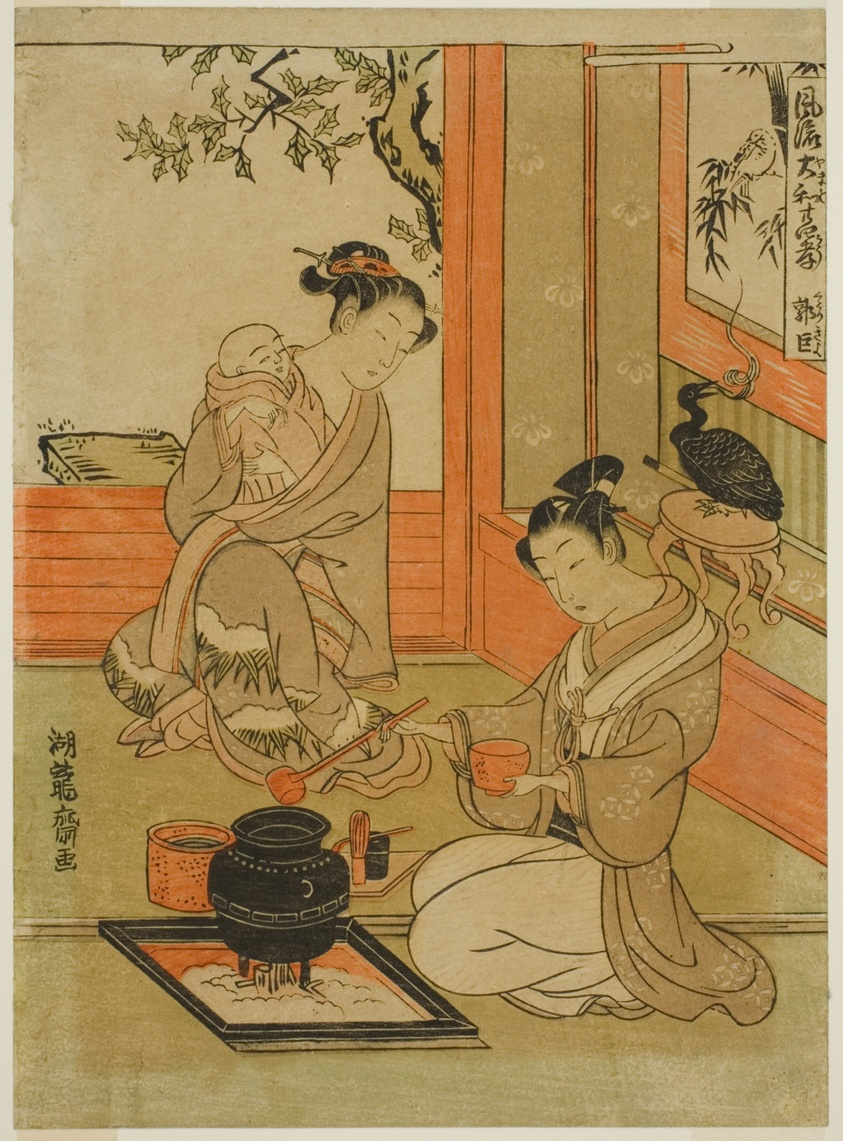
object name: Print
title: Kakkyo (Chinese: Guo Ju), from the series "Fashionable Japanese Versions of the Twenty-four Paragons of Filial Piety (Furyu Yamato nijushiko)"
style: Japanese (culture or style)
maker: Isoda Koryusai (Japanese, 1735-1790)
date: c. 1770/72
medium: Color woodblock print; chuban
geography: Japan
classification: woodblock print; print; asian art